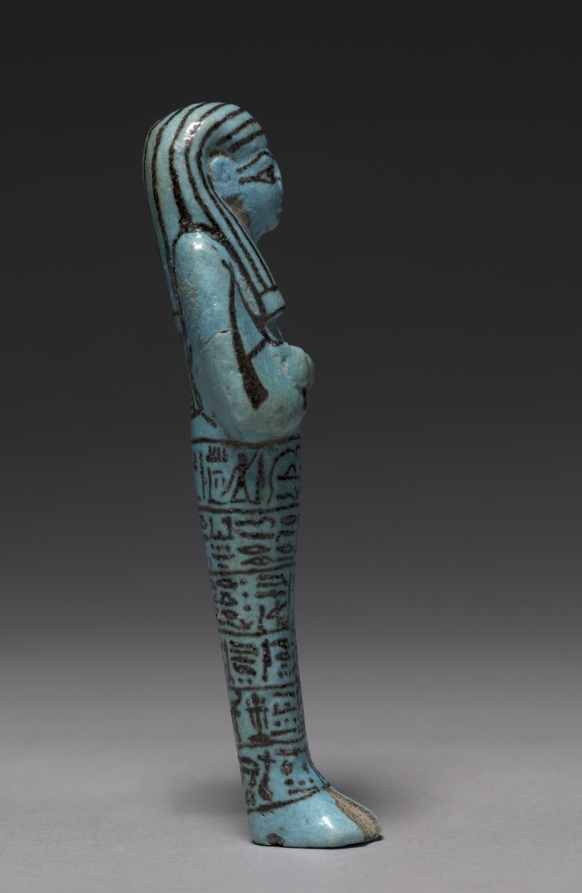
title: Shawabty of Seti I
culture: Egypt, Thebes, New Kingdom, Dynasty 19, reign of Seti 1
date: c. 1294–1279 BCE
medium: medium blue faience with black decoration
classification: Funerary Equipment